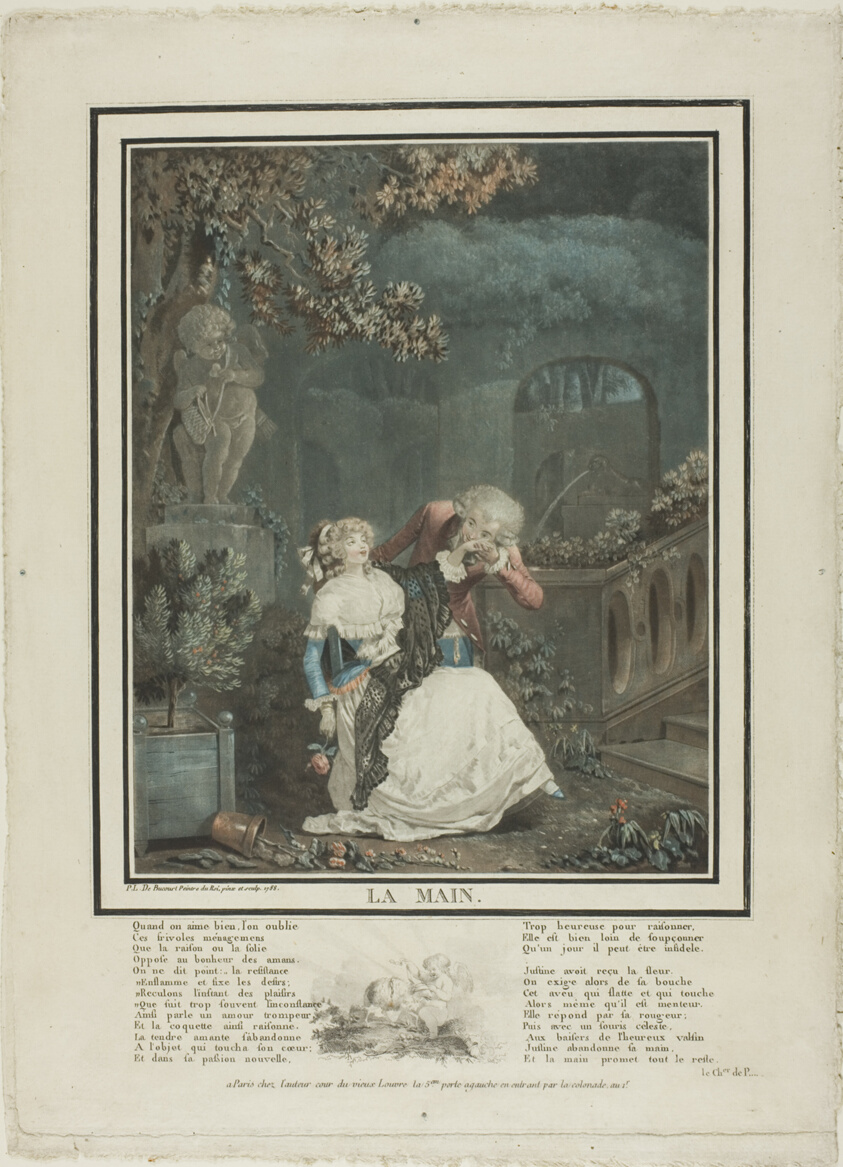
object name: Print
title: The Hand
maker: Philibert Louis Debucourt (French, 1755-1832)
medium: Color aquatint with engraving in black ink on cream laid paper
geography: France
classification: aquatint; print; prints and drawing